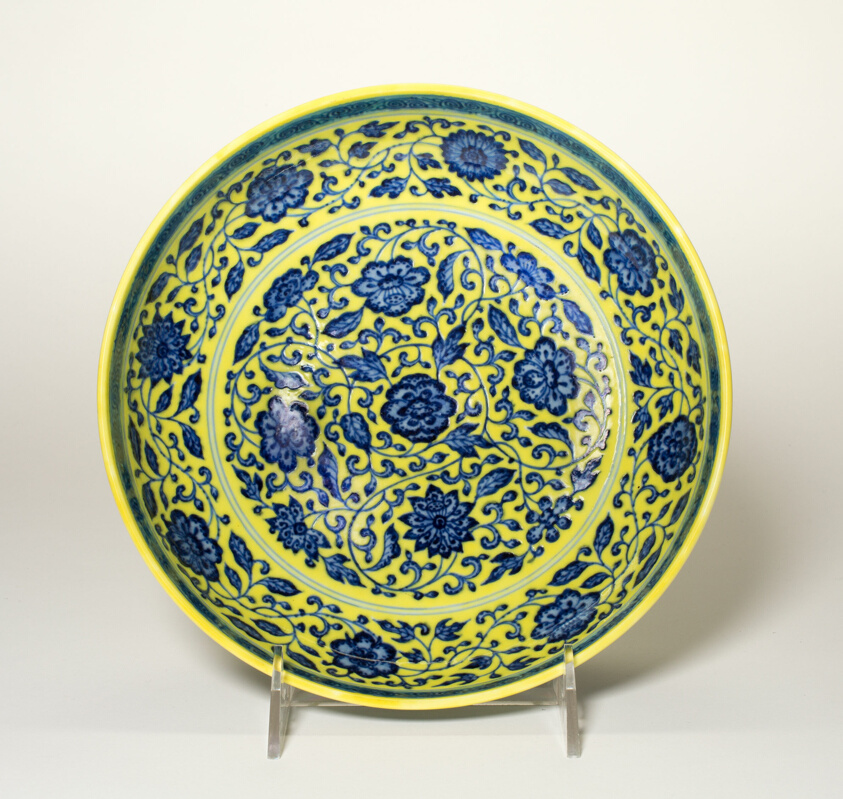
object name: Vessel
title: Dish with Peony and Lotus Flowers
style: Chinese (culture or style)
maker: China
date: Qing dynasty (1644–1911), 18th century, Yongzheng reign mark (1723–1735)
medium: Porcelain with underglaze blue and overglaze yellow enamel decoration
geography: China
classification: dish (vessel); porcelain; asian art; ceramics; vessel